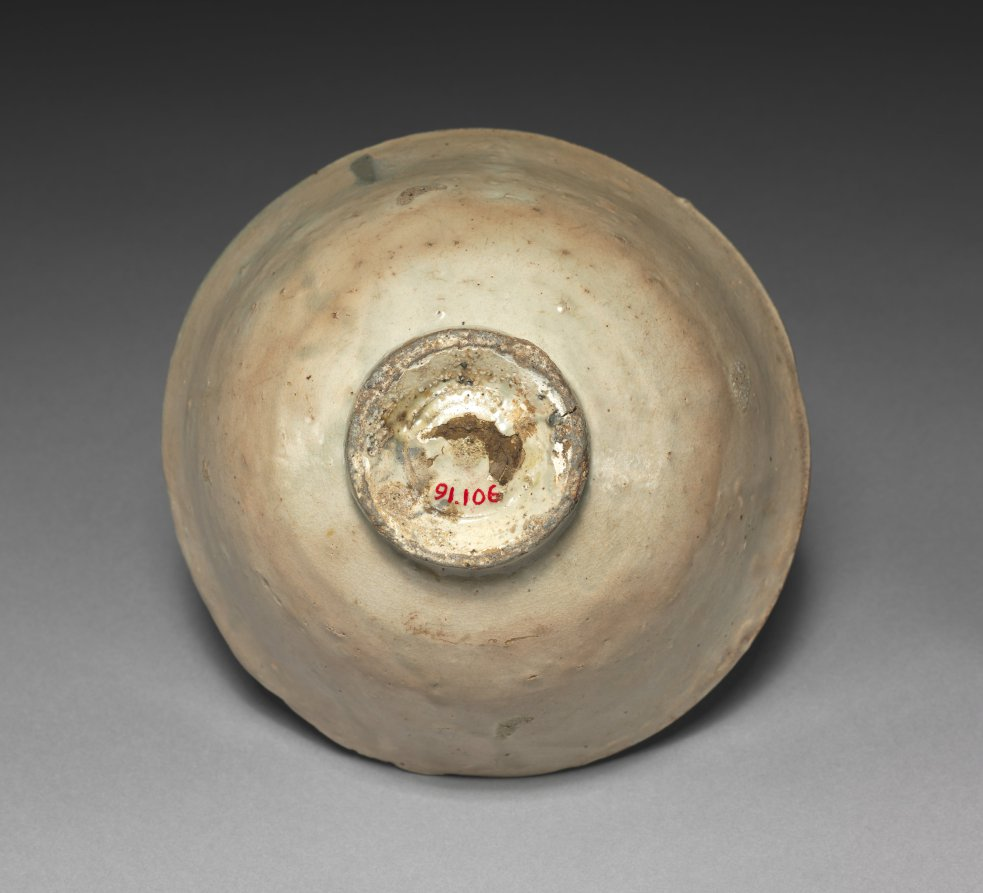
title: Tea Bowl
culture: Korea, Joseon dynasty (1392–1910)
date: 1700s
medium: stoneware with white slip and overglaze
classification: Ceramic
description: This type of wide-mouthed bowl was used every day in Korea, not exclusively for tea drinking. But when it was introduced to Japan around the early 16th century, its imperfect appearance, which evokes the aesthetics of wabi-sabi, caused it to be repurposed as a tea bowl. Korean tea bowls were circulated as a item of foreign luxury among Japanese military elites. Possibly produced in one of the kilns established by the trading office (Waegwan) in Busan, southern Gyeongsang province, this type of tea bowl was sold to Japanese tea bowl collectors. According to a historical record dated to 1641, one trading boat shipped more than 14,000 tea bowls to Japan.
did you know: This type of rustic-looking tea bowl was produced in one of the kilns established by the trading office (Waegwan) in Buan, southern Gyeongsang province, for Japanese tea bowl collectors who admired the beauty of imperfection.